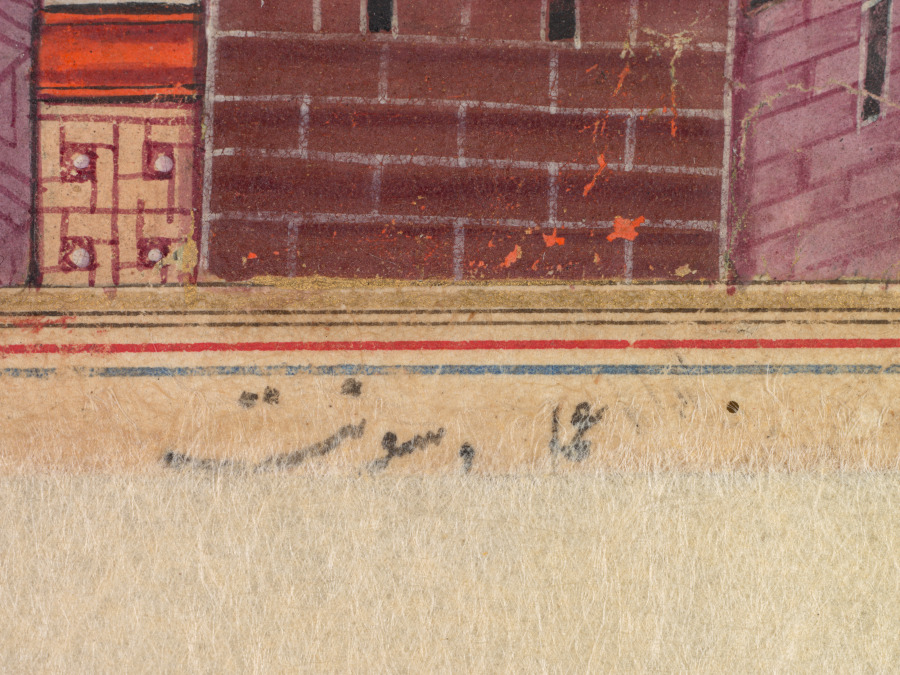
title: The wounded monkey bites the hand of the prince, his chessmate, in the presence of guests, from a Tuti-nama (Tales of a Parrot): Fifth Night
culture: Mughal India, court of Akbar (reigned 1556–1605)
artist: Dasavanta (Indian, d. 1584)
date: c. 1560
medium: gum tempera, ink, and gold on paper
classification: Painting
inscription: 'amal daswant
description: This painting depicts a scene from the cautionary tale the mother parrot tells her young to warn them that interspecies friendships, like theirs with the fox cubs, are a bad idea. She tells them that there once was a monkey who could play chess, and he enjoyed many games with a prince. When the prince invited dignitaries for a party, the monkey made a bad joke, the prince slapped him, and the monkey bit him in return. At the left, food is prepared as the guests look on in astonishment. An inscription at the bottom of the page names the artist, who went on to become one of the most celebrated Indian masters at the Mughal court.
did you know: Young master artist Dasavanta put a layer of cool blue color under his painting.